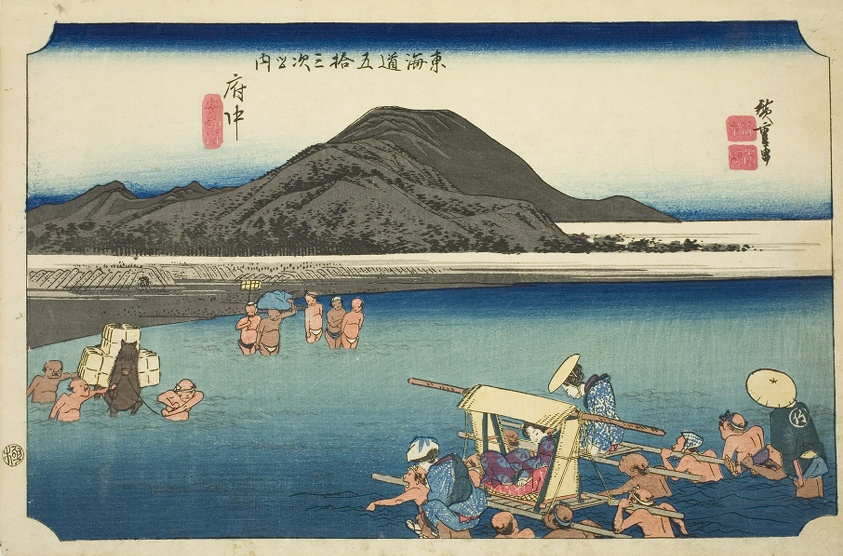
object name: Print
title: Fuchu: The Abe River (Fuchu, Abekawa), from the series "Fifty-three Stations of the Tokaido Road (Tokaido gojusan tsugi no uchi)," also known as the Hoeido Tokaido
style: Japanese (culture or style)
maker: Utagawa Hiroshige 歌川 広重; Japanese, 1797-1858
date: c. 1833/34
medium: Color woodblock print; oban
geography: Japan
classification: woodblock print; print; asian art